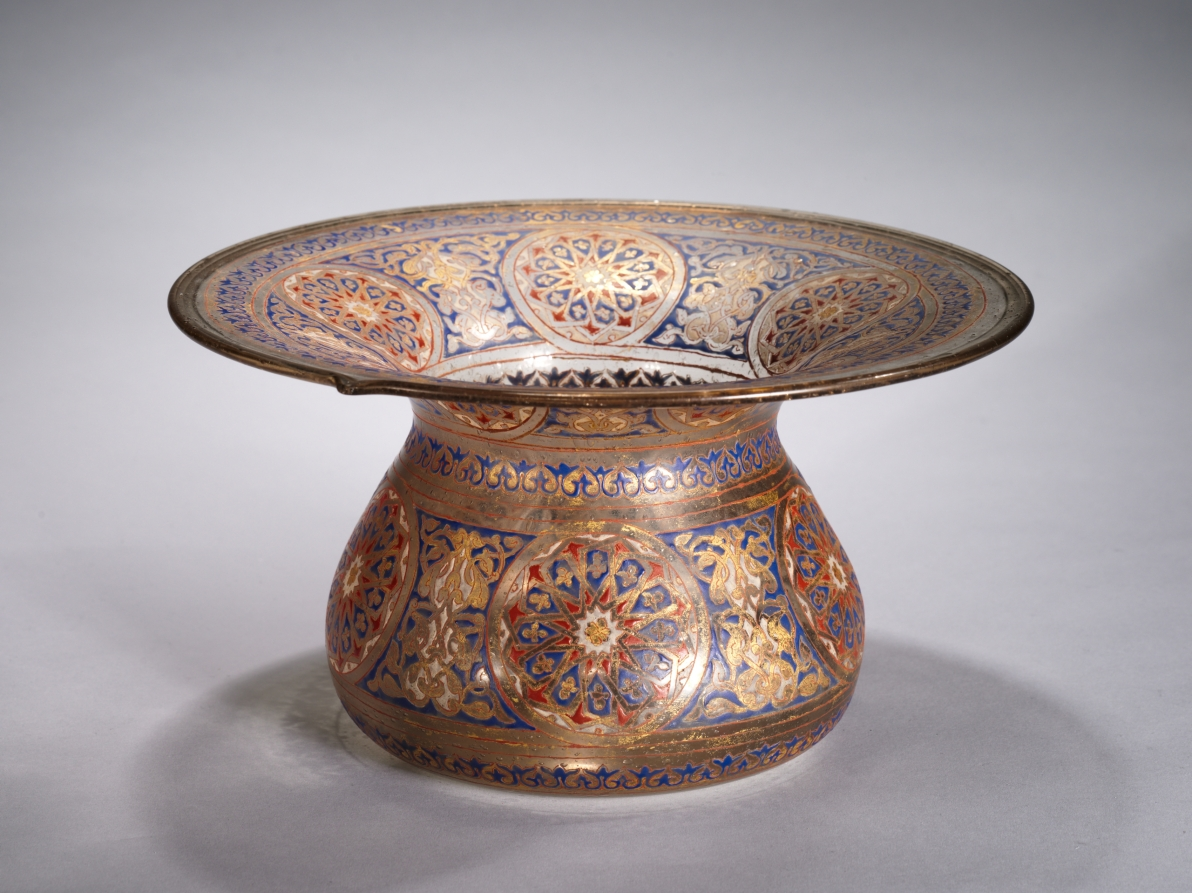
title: Ceremonial Spittoon or Basin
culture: Europe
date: late 1800s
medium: glass with enameled and gilded decoration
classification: Glass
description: This basin, as with the mosque lamp CMA 1981.10, is representative of reproductions of Mamluk glass that were prominent in the late 1800s in Europe during a period of resurgence of interest in Islamic art. At this time, collectors and artists revived the techniques of enameling and gilding that are hallmarks of Mamluk glass.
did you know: The intense enamel colors form striking star and leaf patterns.